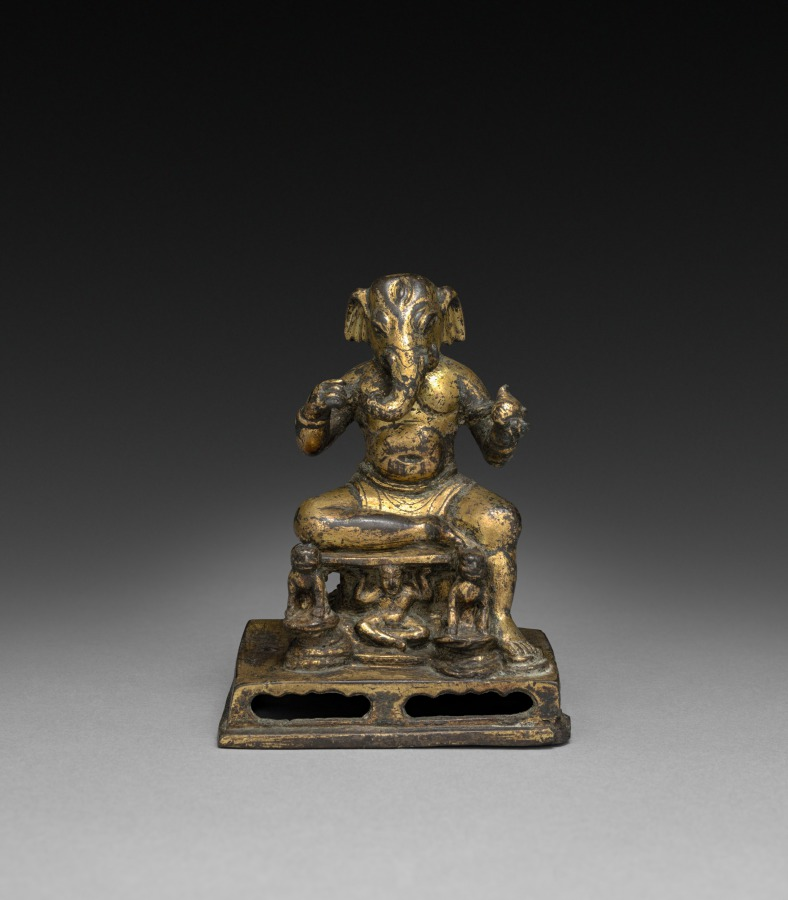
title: Ganesha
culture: China, Tang dynasty (618-907)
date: 618–907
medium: gilt bronze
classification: Sculpture